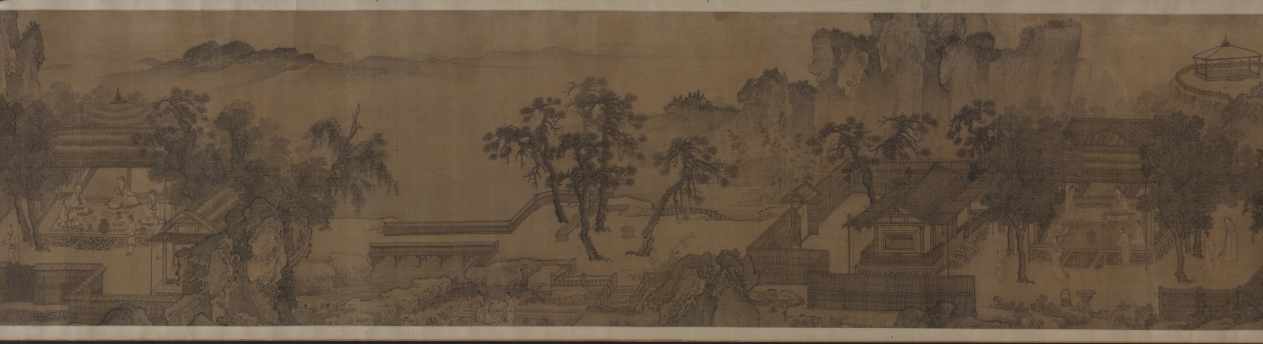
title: Tao Yuanming's Return Home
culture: China, Yuan dynasty (1271-1368)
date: 1300s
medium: Handscroll; ink and slight color on silk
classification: Painting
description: Tao Yuanming's revered poem "Return Home 歸去來辭 (Gui qu lai ci)" powerfully conveys his desire to leave bureaucratic life for the simplicity and authenticity of nature. This sentiment has deeply resonated with generations of Chinese scholars, making it a popular theme in paintings. This handscroll uses continuous narrative depicting Tao in multiple scenes from the poem. Starting on the right, the poet travels to his home. His children wait by the gate, while his wife pauses to tidy her hair before welcoming him. Then, free from the burdens of official service, Tao spends time in both nature and his cottage, where he can again enjoy wine, music, and books.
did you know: Poet Tao Yuanming 陶淵明 (c. 365–427 CE) returned to a secluded life instead of pursuing a civil service career.